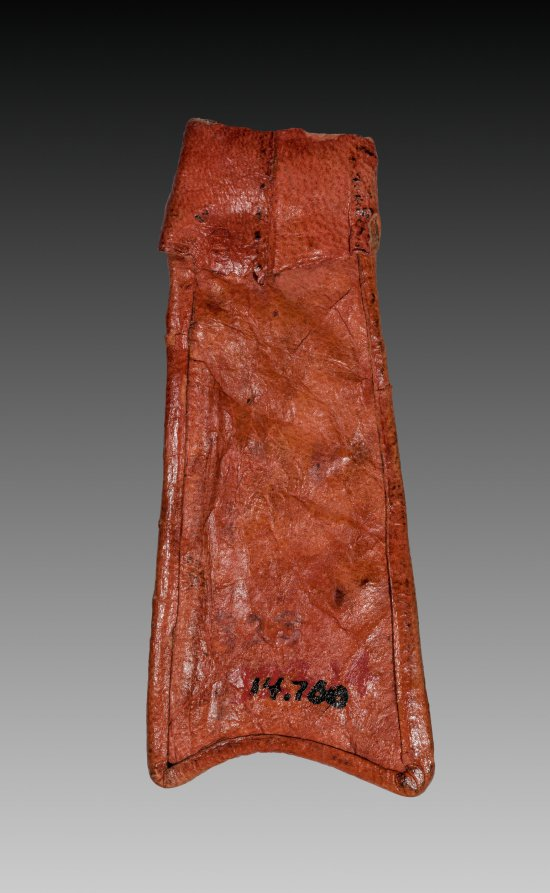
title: Tab from Mummy Band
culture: Egypt, Third Intermediate (1069–715 BCE), Dynasty 22, reign of Osorkon I (992–887 BCE)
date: 945–715 BCE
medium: stained leather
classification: Funerary Equipment